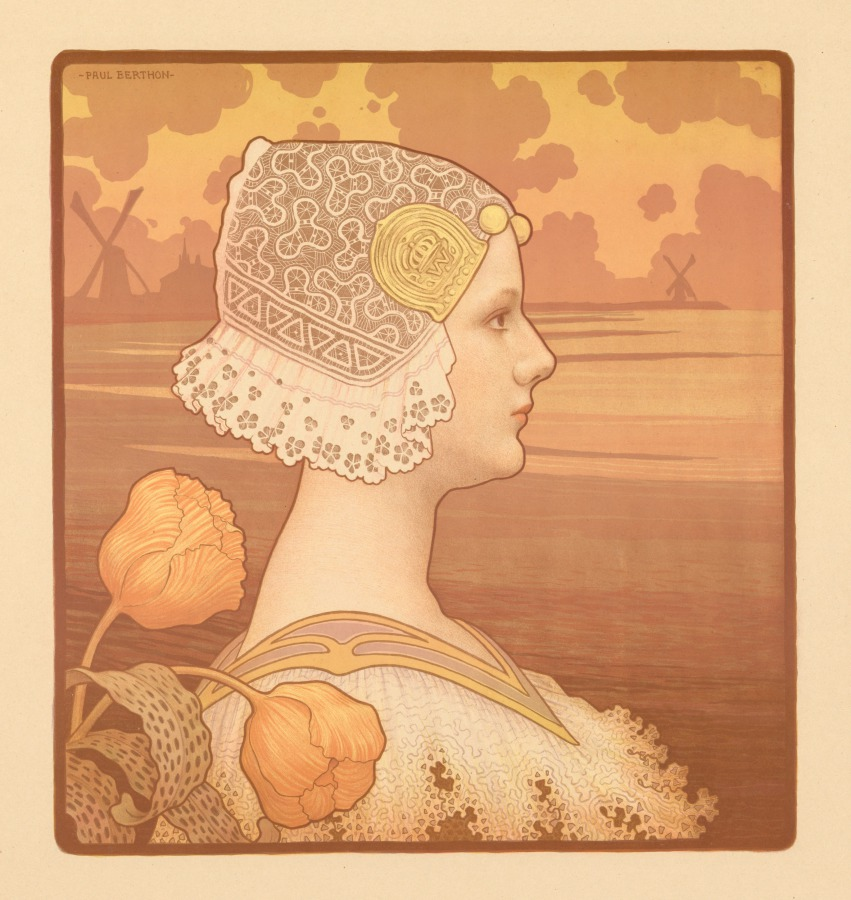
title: Her Most Gracious Majesty Queen Wilhelmina (Sa Très Gracieuse Majesté La Reine Wilhelmine)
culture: France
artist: Paul Berthon (French, 1872–1909)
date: 1901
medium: color lithograph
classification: Print